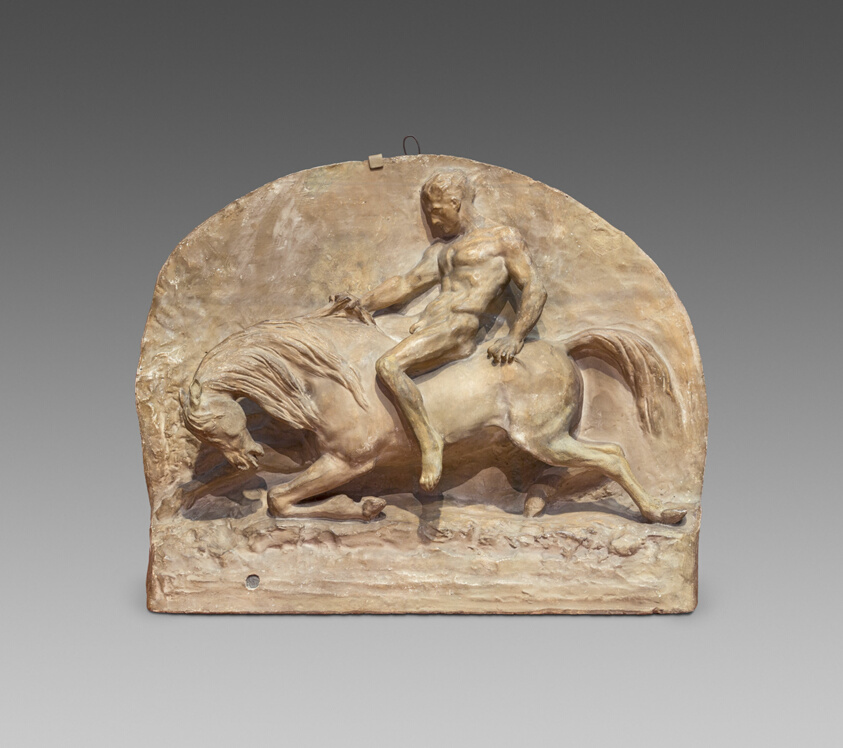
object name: Sculpture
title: Fall of a Cavalier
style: nineteenth century, 19th century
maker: Antonin Moine (French, 1796–1849)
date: 1831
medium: Patinated plaster bas-relief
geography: France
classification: relief; sculpture; french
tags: man, animals, horse, nudes